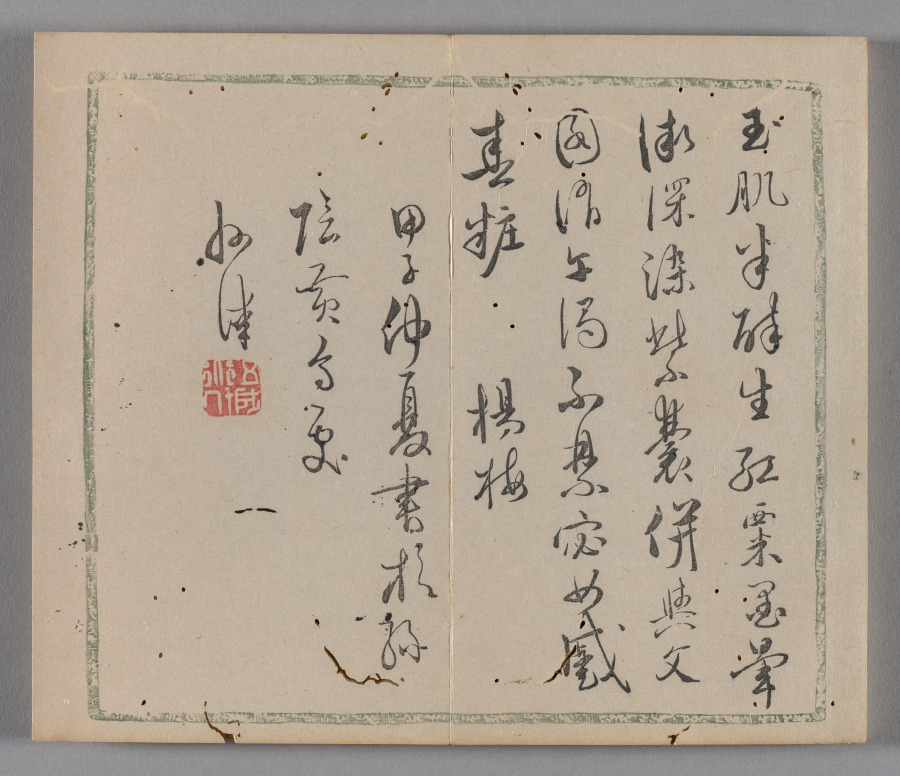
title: Ten Bamboo Studio Collection of Calligraphy and Painting: Round Fans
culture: China, Qing dynasty (1644-1911)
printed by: Hu Zhengyan (Chinese, c. 1584–1674)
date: 1633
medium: Woodblock-printed book; ink and colors on paper; first edition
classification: Print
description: Color printing reached a level of perfection in the early 1600s, as seen in this Ten Bamboo Studio Collection of Calligraphy and Painting and the Mustard Seed Garden Manual of Painting (printed 1679 and 1701). The painterly quality, precision in registering (aligning) the woodblocks, and harmonious colors made them the most successful color print editions in Chinese history. Both editions were printed and compiled in Nanjing, spread nationwide, and had a great impact on the arts in Japan and Korea.